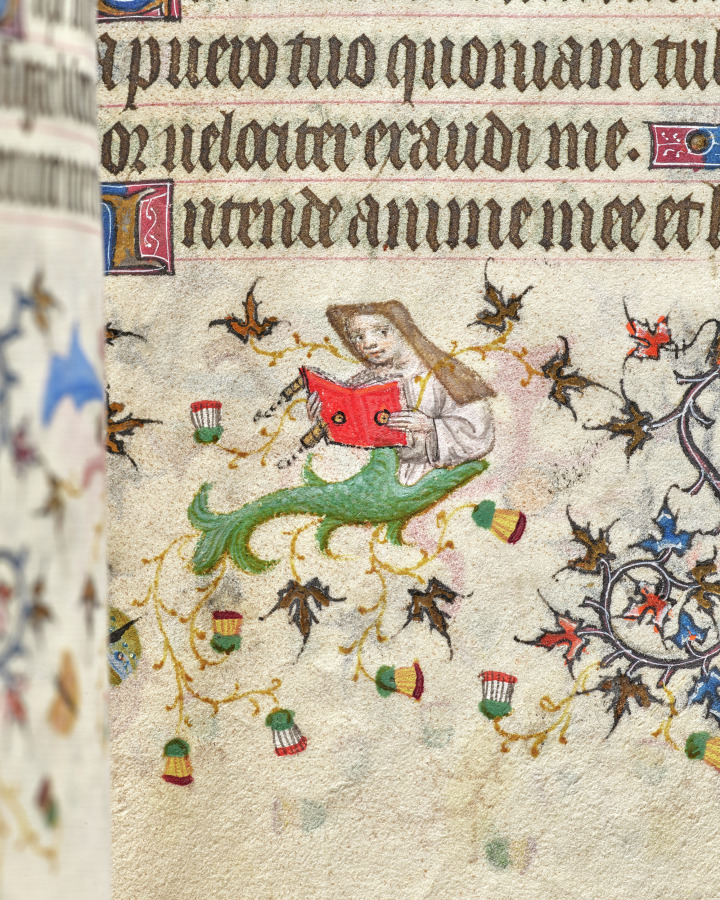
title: Hours of Charles the Noble, King of Navarre (1361-1425): fol. 188r, Text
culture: France, Paris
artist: Master of the Brussels Initials and Associates (French)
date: c. 1405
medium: ink, tempera, and gold on vellum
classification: Bound Volume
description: This precious volume was obviously highly prized by its owner, the French-born King of Navarre, who had his coat of arms painted on no less than twenty folios. Rather than directly commissioning this manuscript from a specific workshop, it seems that Charles the Noble acquired his book of hours -- perhaps ready-made for the luxury market -- while on a trip to Paris in 1404-05. A collaborative effort, six painting styles are evidenced within the pages of this codex, those of two Italians, two Frenchmen, and two Netherlanders. The painter who was responsible for the planning and decoration of the book, and who produced seventeen of the large miniatures, was a Bolognese artist known as the Master of the Brussels Initials. His principal assistant, responsible for most of the borders, was a Florentine who signed his name "Zecho" da Firenze on folio 208 verso.